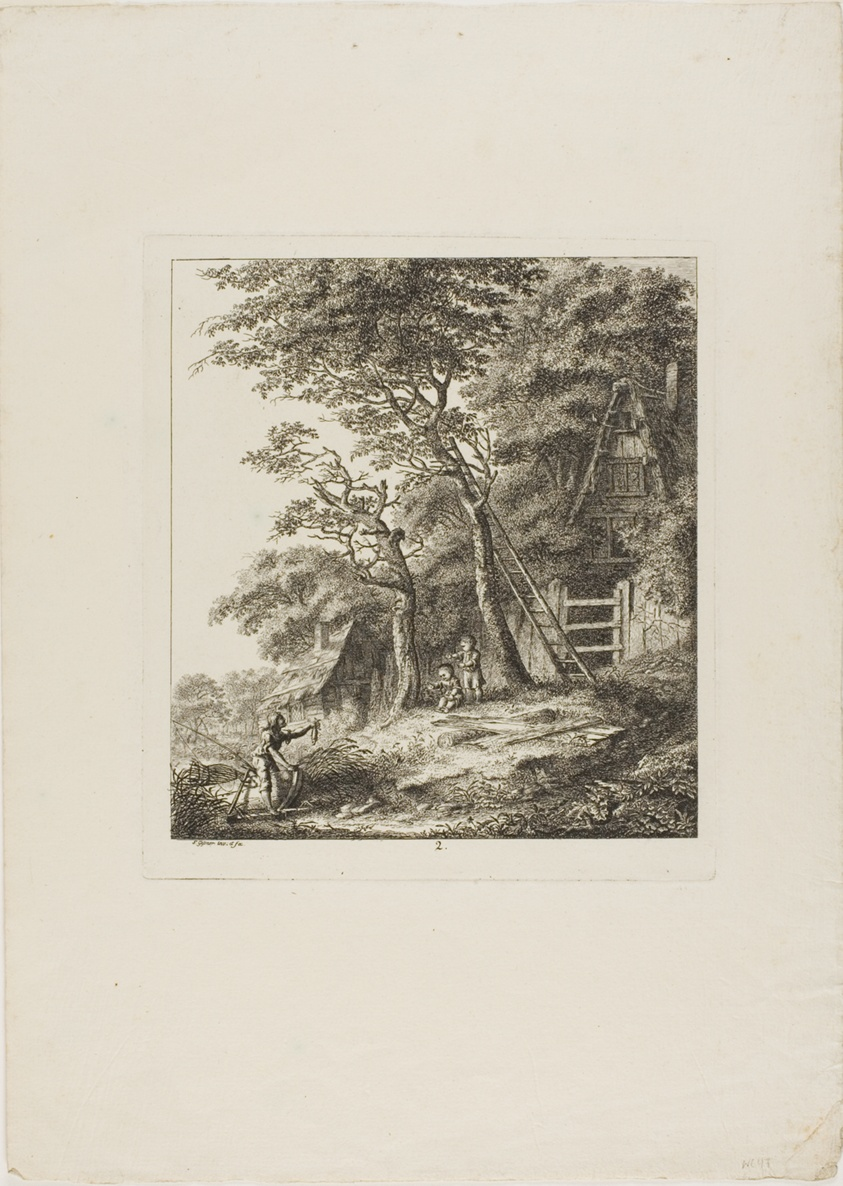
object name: Print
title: Fishermen with Children, plate two from Paysages Dédiés à M. Warelet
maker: Salomon Gessner (Swiss, 1730-1788)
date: 1764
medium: Etching on cream laid paper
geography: Switzerland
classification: etching; print; prints and drawing